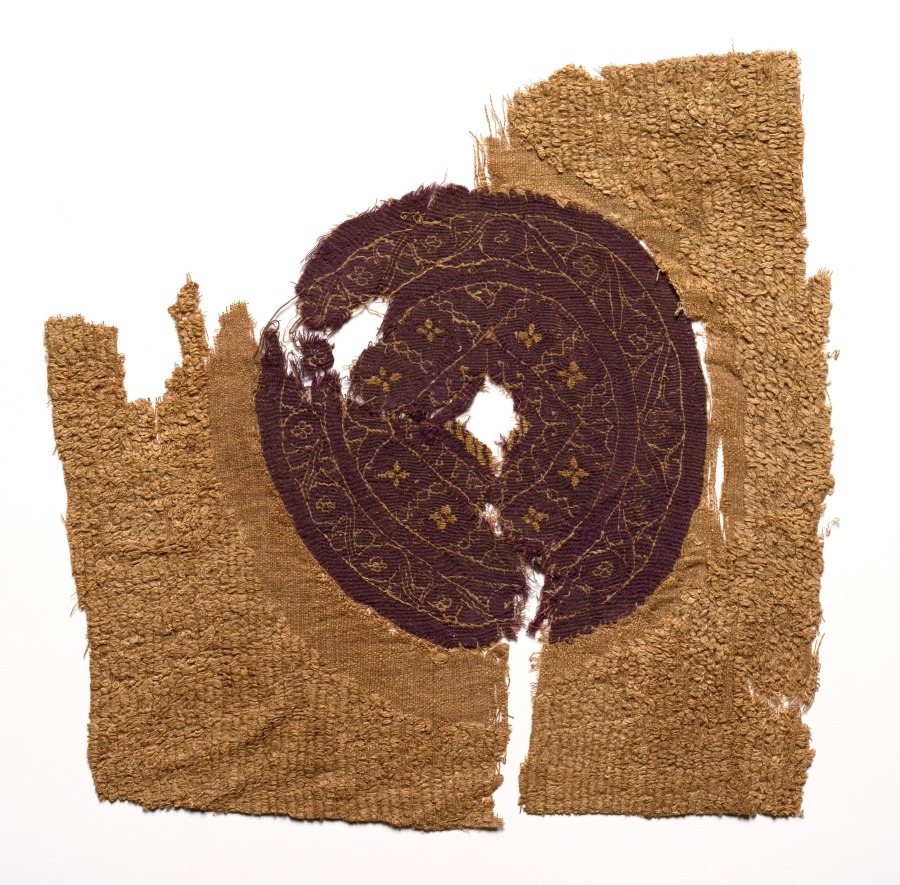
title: Fragment with Gold Foil, from a Furnishing Fabric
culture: Egypt, Byzantine period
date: 300s–400s CE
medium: undyed linen, dyed wool, and gold foil; plain weave with supplementary weft-loops, slit-tapestry weave with supplementary weft wrapping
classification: Textile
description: The rare gold foil and rich purple wool in these two fragments originally enriched a luxurious fabric. Costly gold foil wrapped around a silk core forms the central motif within a diamond, woven in tapestry weave. The surrounding interlacing knot design—achieved with three overlapping squares (in the small fragment) or interlacing squares (in the large fragment)—offered protection from danger and harm. The roundels were woven with extra, or supplementary, linen wefts wrapped on the purple ground. Linen pile loops in the ground fabric resisted abrasion in furnishing fabrics and provided insulation in tunics.